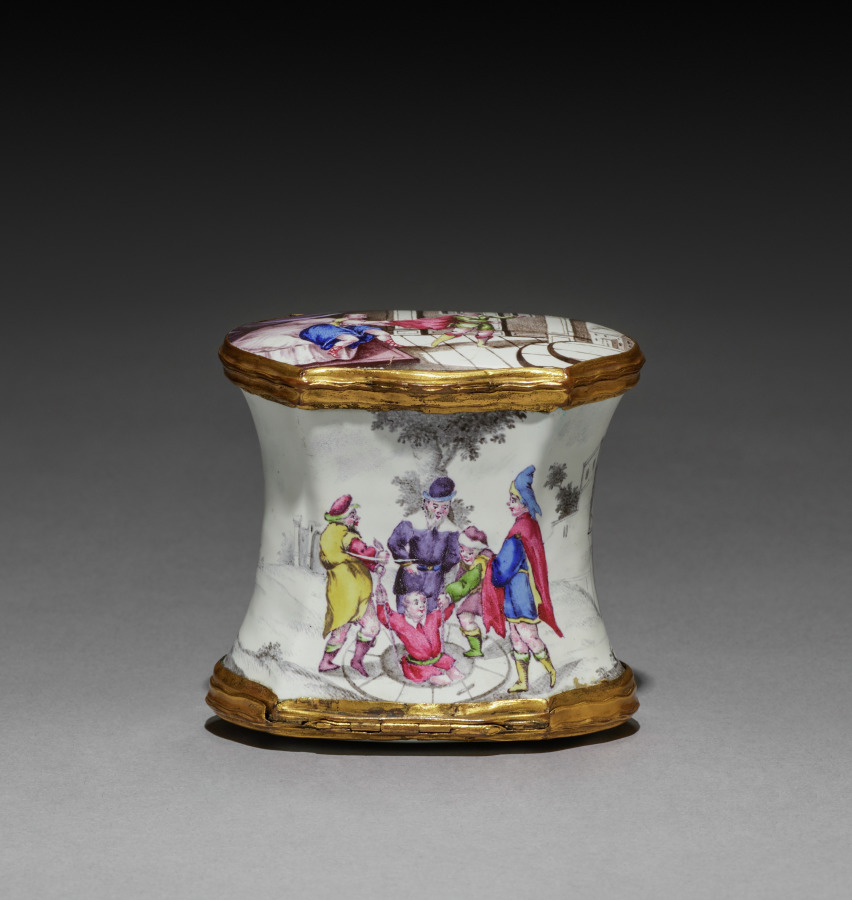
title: Box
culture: Germany, Augsburg, 18th century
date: c. 1730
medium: enamel on copper with metal mounts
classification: Miscellaneous